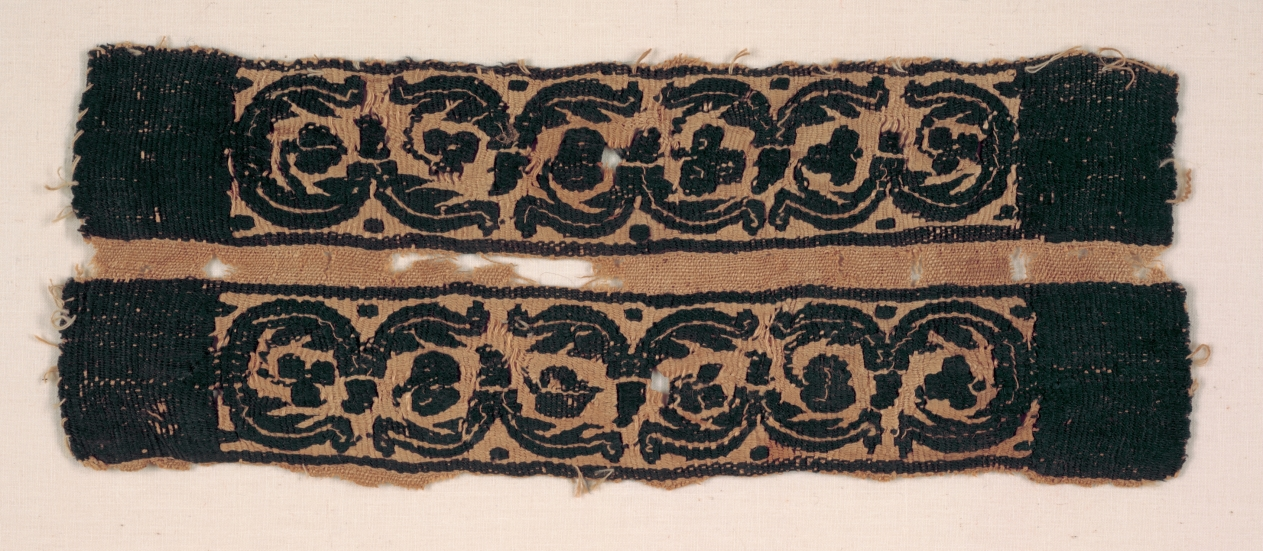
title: Sleeve Band from a Tunic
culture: Egypt, Byzantine period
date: 400s - 500s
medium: tabby weave with inwoven tapestry ornament, linen and wool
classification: Textile